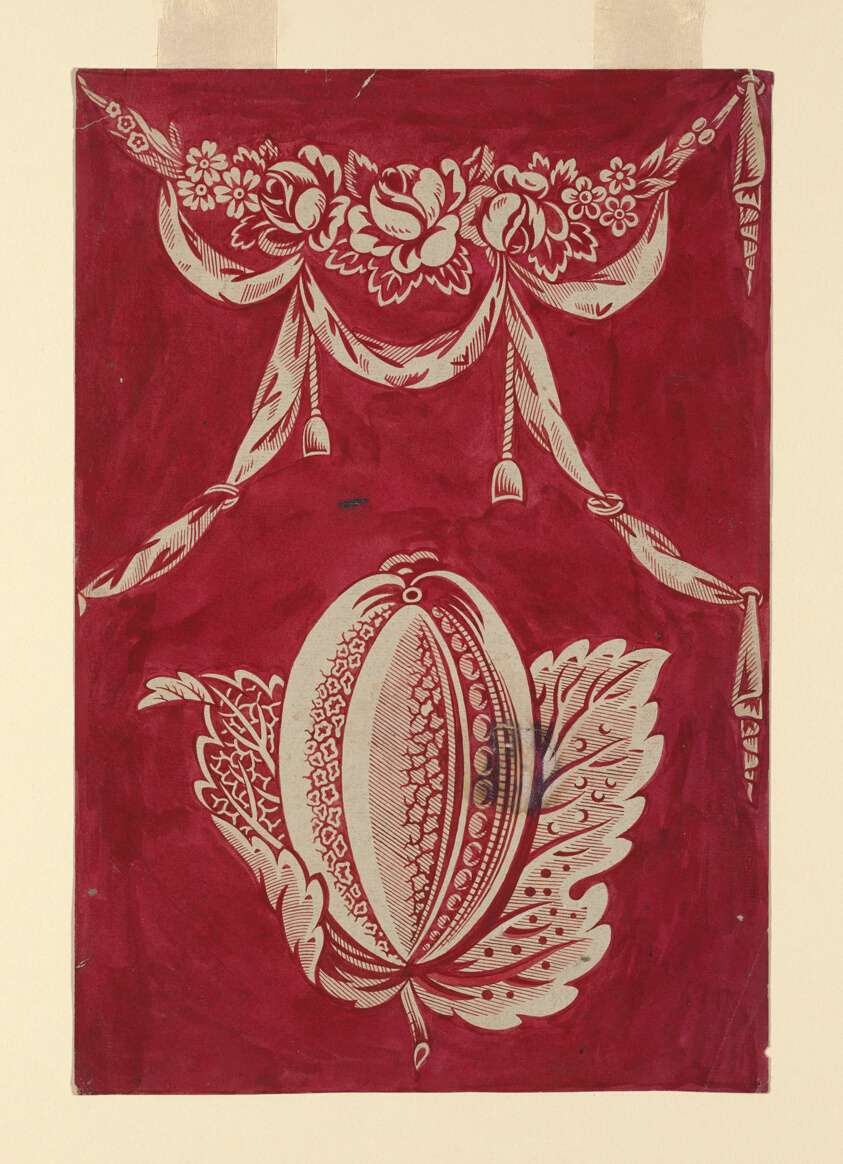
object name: Textile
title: Design for a Printed Textile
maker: France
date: 18th century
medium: Watercolor on paper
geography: France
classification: textile; accessory - paper design